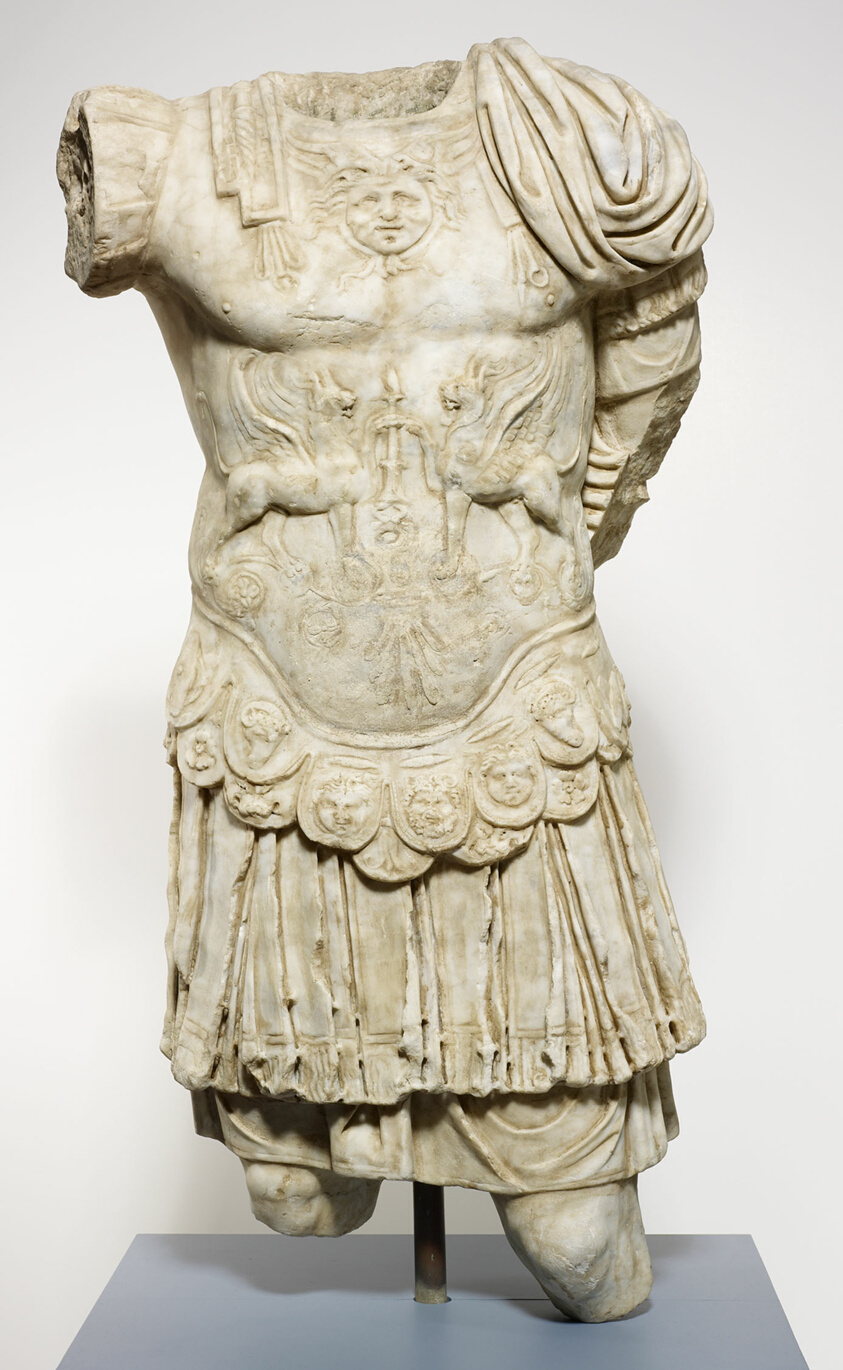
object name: Sculpture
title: Fragment of a Portrait Statue of a Man, Perhaps a Roman Emperor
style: roman (ancient, style or period)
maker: Roman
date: late 1st-early 2nd century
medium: Marble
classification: sculpture